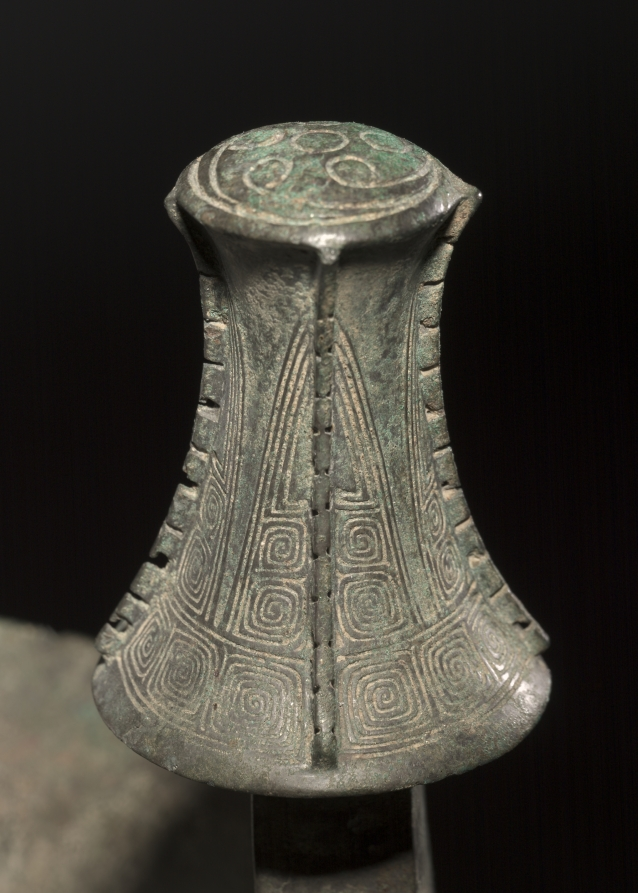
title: Wine Vessel (Jia)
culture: China, Shang dynasty (c. 1600–c. 1046 BCE), Anyang phase (c. 1250–1046 BCE)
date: c. 1250–1046 BCE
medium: bronze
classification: Metalwork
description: This large wine vessel (or jia) is among those very rare, monumental pieces uncovered from Anyang, the last royal capital of the Shang dynasty (c.1700–c.1100 BCE). Probably very few monumental bronze vessels were ever made; each of them must have cost a fortune and was used to designate high-ranking (often royal) status. Even fewer have survived. This wine vessel was used for the ancestral rites of the Shang. Its three splayed legs supported the cup over a fire, suggesting that the wine might be heated. Offering wine and food to their departed ancestors was an essential ritual practice performed by the Shang royalty and aristocracy. The Shang people believed that their ancestors were able to intercede with the high god to confer fruitful harvests and victories in battles. Their ritual actions involved communication with the supernatural realm (and this was further supported by the practice of divination with the use of a tortoise shell or a cattle shoulder blade). Here, the animal mask on the bronze vessel stares frontally at the viewer and serves symbolically as a messenger of communication with the ancestors. It conjures up the potency of mystery, whereas the static monumentality of the bronze vessel lends an air of dignified solemnity to the ritual ceremony.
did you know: Ancient bronze vessels are ritual and religious in nature, linked inextricably to political legitimization, and are source materials for Chinese historiography and traditional antiquarianism.